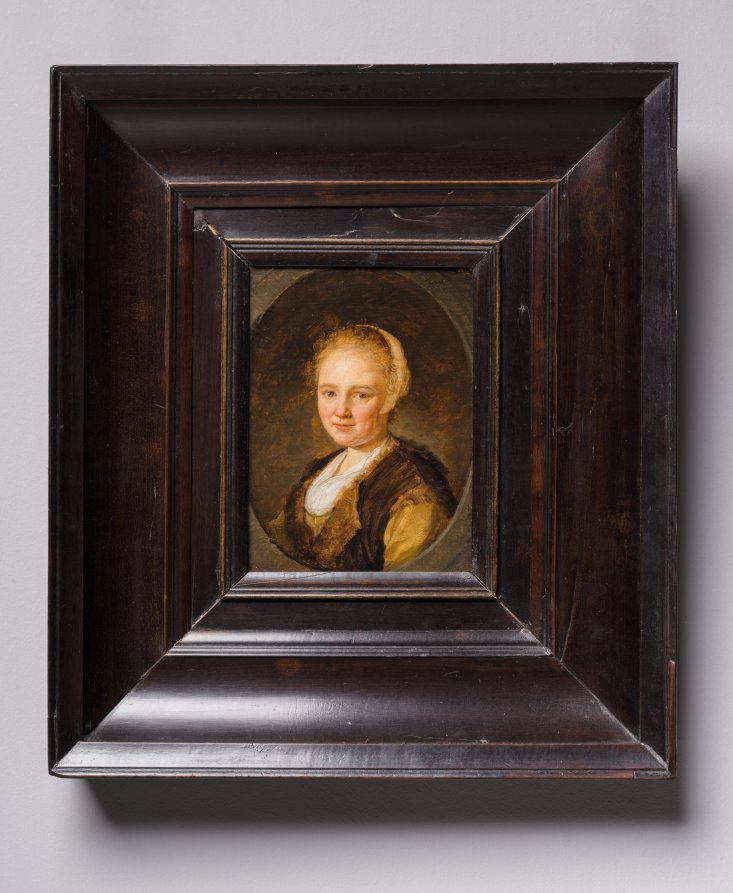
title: A Young Woman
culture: Netherlands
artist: Gerrit Dou (Dutch, 1613–1675)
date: 1640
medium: oil on wood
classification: Painting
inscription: Signed left center: "GDov."; "[GD in monogram]"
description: This painting may depict a specific person as in a traditional portrait. The less formal costume and the tight focus on the head, however, may mean that it is a tronie, a popular category of painting among Dutch painters in the 1600s. While painted from living models, tronies represent more general types of people, designed as beautiful images rather than accurate likenesses of people known to their patrons.